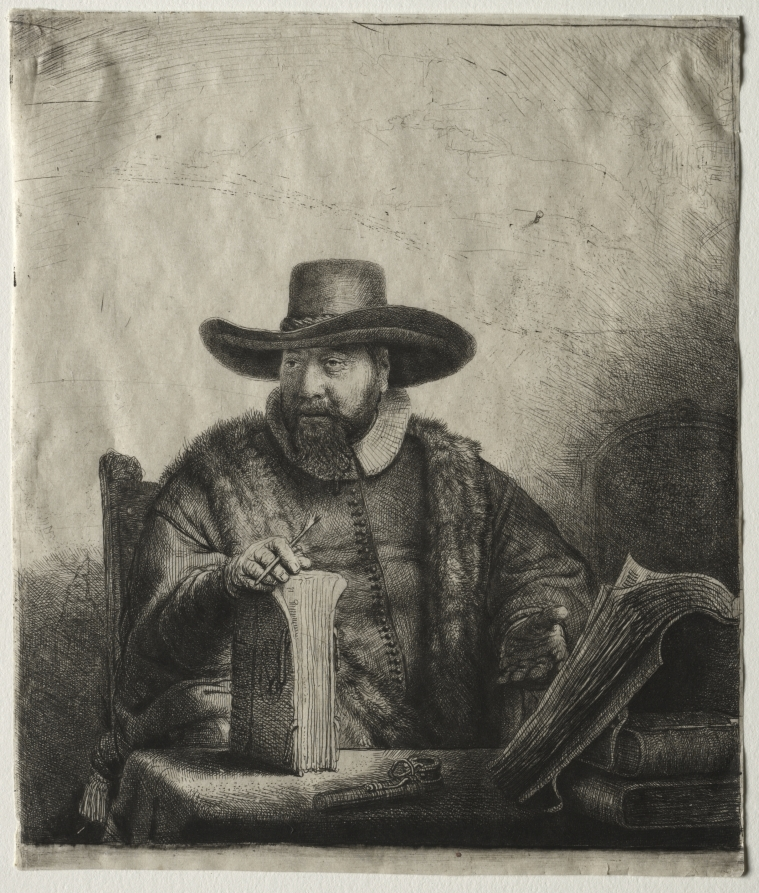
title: Cornelis Claesz Anslo, Mennonite Preacher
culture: Netherlands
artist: Rembrandt van Rijn (Dutch, 1606–1669)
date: 1641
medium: etching and drypoint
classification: Print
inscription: lower right, in plate: Rembrandt f / 1641 ; VERSO, lower left, in graphite: a 57958 ; lower left, in graphite: Z Amn[underlined] ; lower center, in graphite: 1520/13[upside down] ; lower center, in graphite: 91194 ; lower right, in graphite: m\a\·